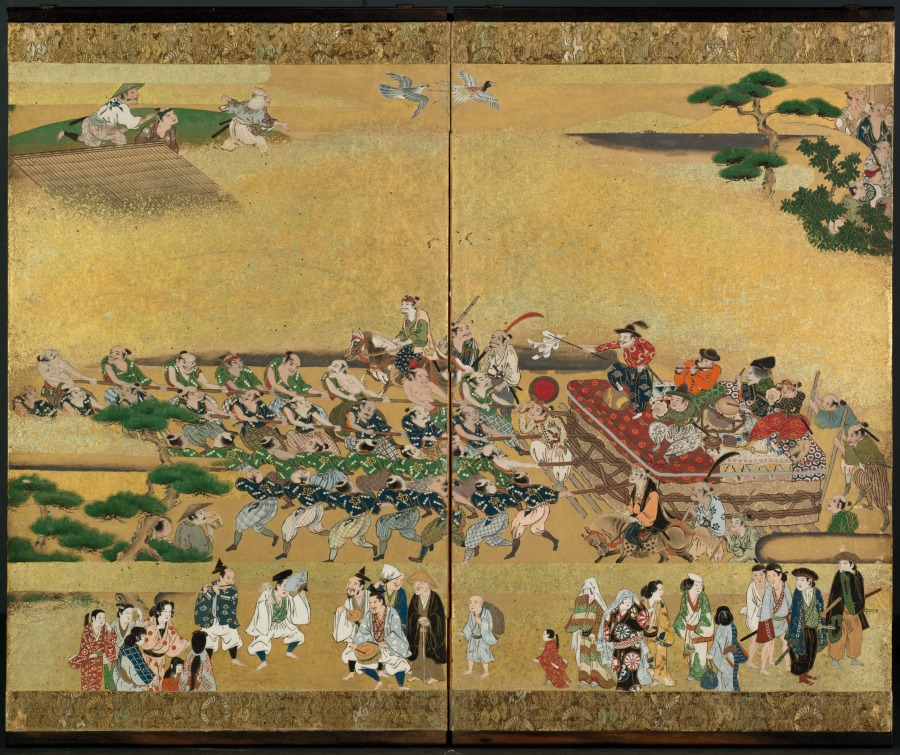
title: Festival Scenes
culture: Japan, Edo period (1615–1868)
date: 1600s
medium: one of a pair of six-panel folding screens; ink, color, gold, and gold leaf on paper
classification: Painting